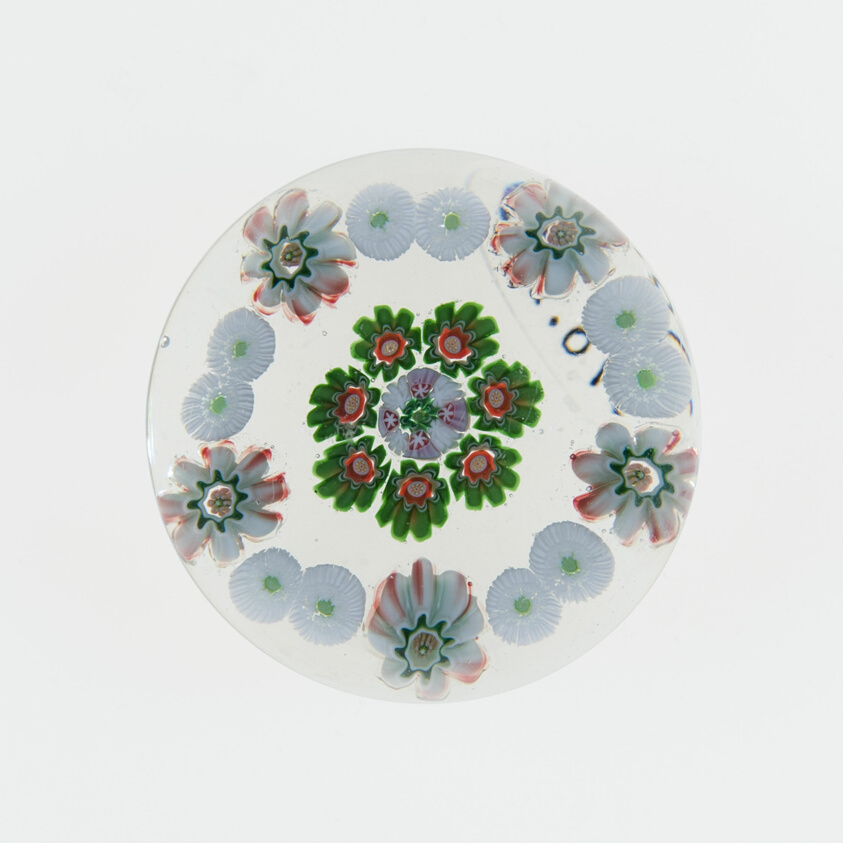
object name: Glass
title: Paperweight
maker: Clichy Glassworks (Cristalleries de Clichy); Clichy, France, 1837-1885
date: 19th century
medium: Glass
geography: Clichy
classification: paperweight; millefiori; european decorative arts; glass